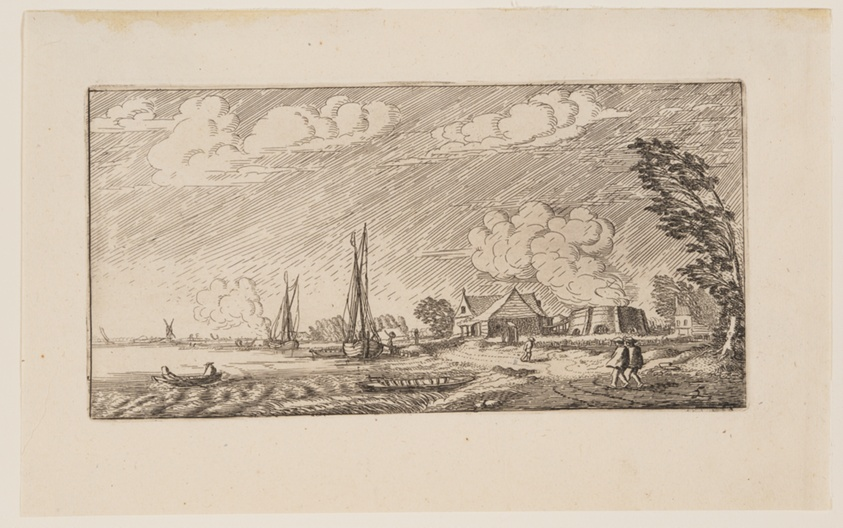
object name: Print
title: Lime-Kiln in Stormy Weather, from Six Landscapes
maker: Jan van de Velde II; Dutch, c. 1593–1641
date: c. 1613-1640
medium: Etching on ivory laid paper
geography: Netherlands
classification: etching; paper; print; prints and drawing